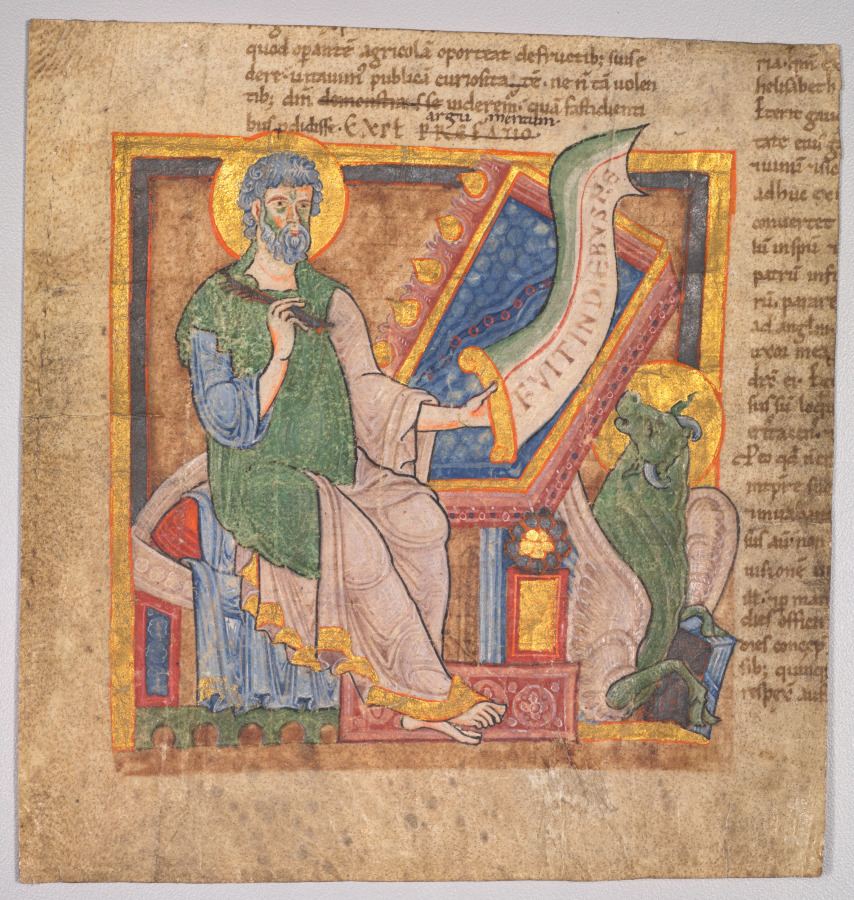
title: Miniature from a Latin Bible: Saint Luke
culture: France, Burgundy, Abbey of Cluny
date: c. 1100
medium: ink, tempera, and gold on vellum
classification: Manuscript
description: Inspired by Byzantine painting, this rare miniature represents the last surviving fragment of a once magnificent bible. The fundamental text of every medieval monastery was the Latin Bible. Monastic bibles at this time were usually large, cumbersome books (commonly in two or three volumes) designed to be recited from a lectern-rather than for private study. This exquisite miniature was excised from such a bible and introduces the beginning of the Gospel of St. Luke. Undoubtedly copied and painted in the scriptorium at Cluny, the bible may have been influenced by a manuscript carried to Cluny from Byzantium, or else may represent the work of an Italian artist working at Cluny but acquainted with Byzantine modes of painting. A large monastery such as Cluny probably had up to a dozen copyists continuously producing such manuscripts. A surviving 12th-century booklist records that Cluny possessed some 570 volumes, a large number for the time.